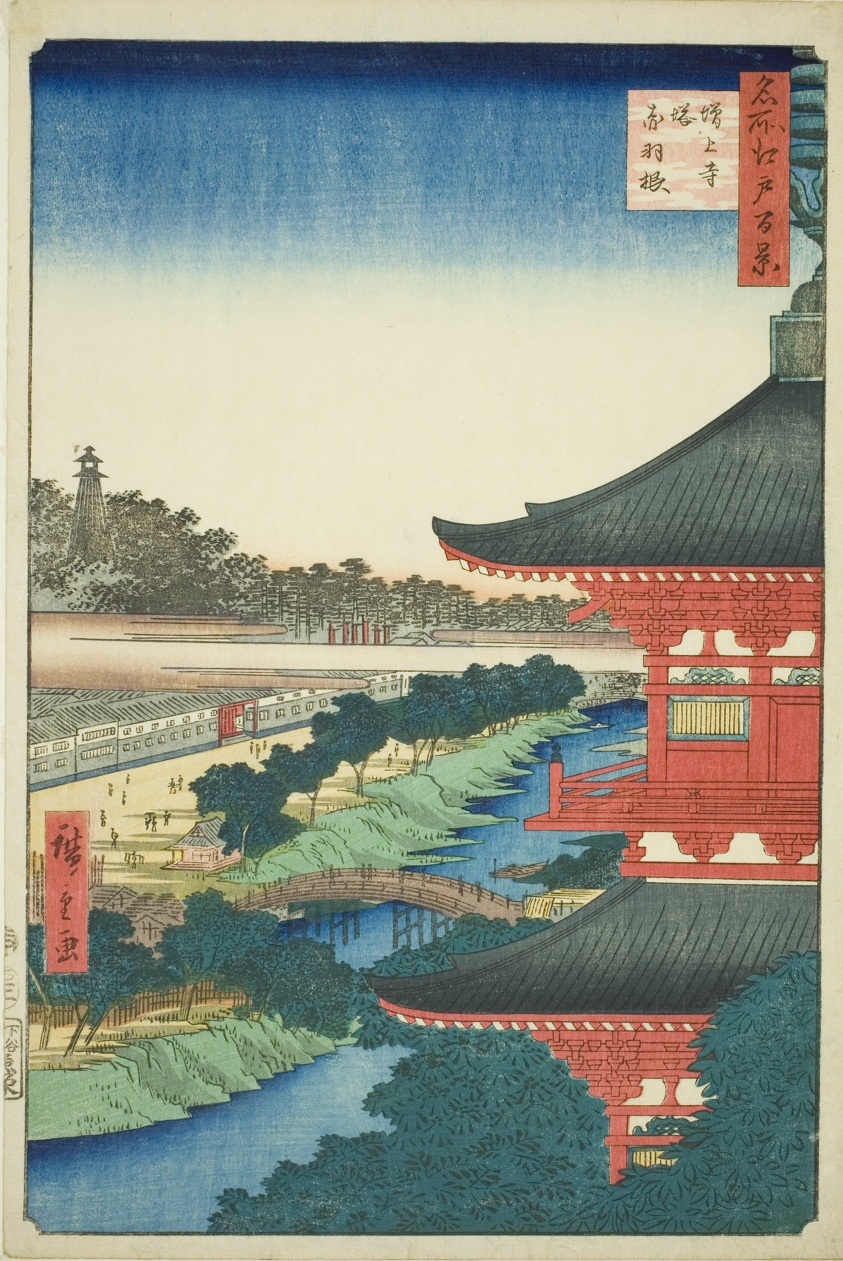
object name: Print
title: The Pagoda at Zojo Temple and Akabane (Zojoji to, Akabane), from the series "One Hundred Famous Views of Edo (Meisho Edo hyakkei)"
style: Japanese (culture or style)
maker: Utagawa Hiroshige 歌川 広重; Japanese, 1797-1858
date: 1857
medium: Color woodblock print; oban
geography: Japan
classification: print; asian art